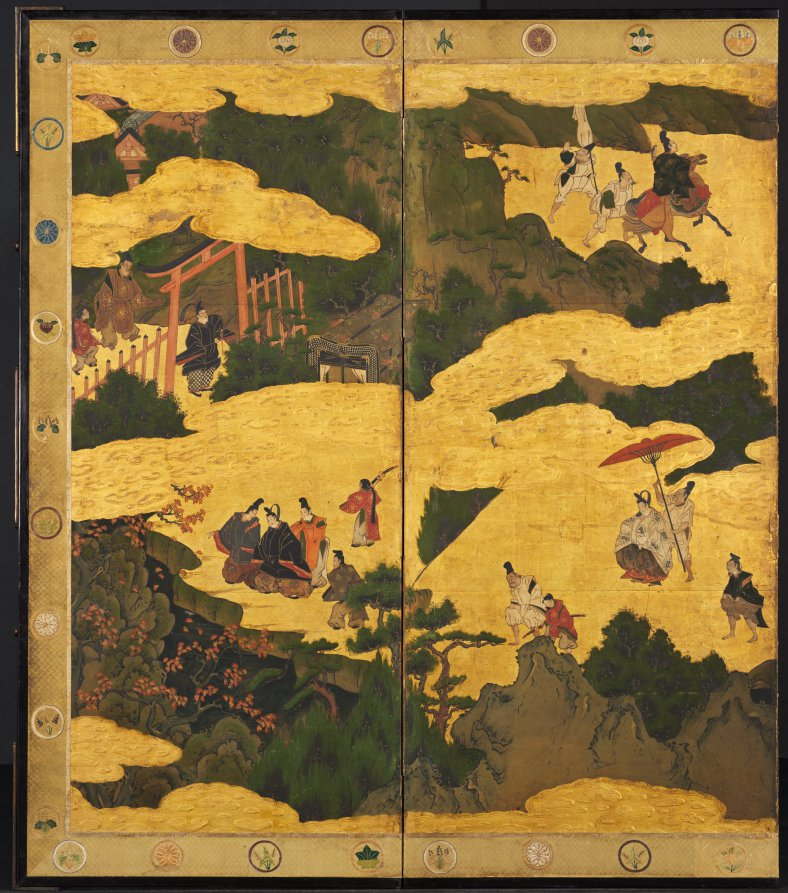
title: Scenes from the Tales of Ise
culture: Japan, Edo period (1615–1868)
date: mid-1600s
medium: One of a pair of six-panel folding screens; ink, color and gold on paper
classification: Painting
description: While the 11th-century Tale of Genji is universally regarded as Japan's literary masterpiece, the source for visual imagery in Japanese culture is rivaled by another literary classic, the Tales of Ise. A 10th-century anthology of poems interspersed with commentary, the Ise portrays the emotional and geographical journey of a courtier from the capital (Kyoto) into the countryside and beyond. The poems describe features of the natural, untamed terrain, linking them to the rather melancholy state of the traveler. Since the Tales of Ise was—and remains today—well read by educated Japanese, a person viewing these folding screens would immediately recognize its subject, organized as a series of discrete scenes read from right to left. Neither a signature nor a seal identifies the artist, but judging from related paintings, the work can be ascribed to an artist working in Kyoto during the first quarter of the 17th century in the manner of the painter Iwasa Matabei (1578–1650). This type of historical narrative composition became quite popular around 1600 among patrons favoring a distinctly Japanese style of painting which employed rich mineral pigments and a liberal use of gold.